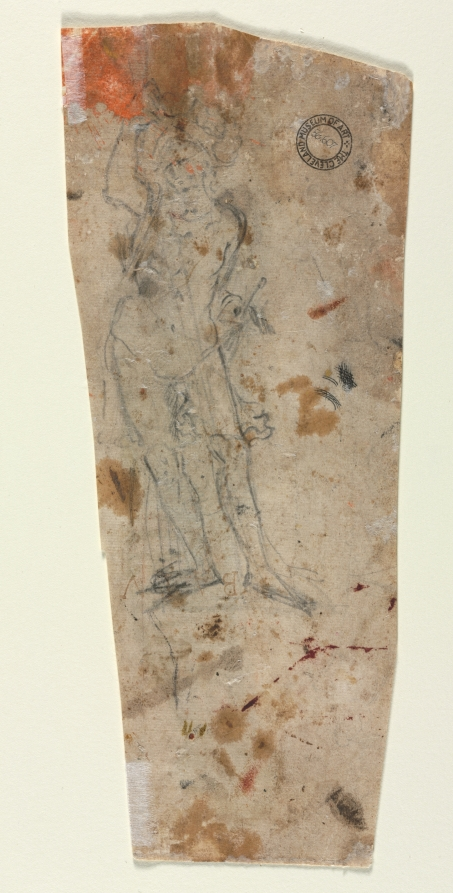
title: Sketch of an Armoured Male Figure (verso)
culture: Flanders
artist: Anonymous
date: 1600s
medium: graphite (figure); pen and black ink (cross hatching); random paint and ink stains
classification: Drawing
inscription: upper center, in brown ink: BALV [upside down]